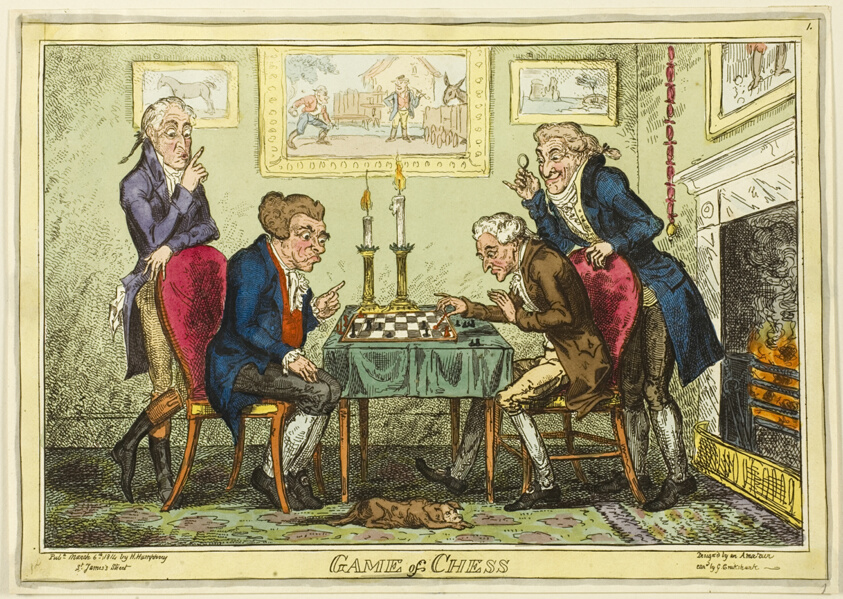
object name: Print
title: Game of Chess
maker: George Cruikshank (English, 1792-1878); after Captain Frederick Marryat (English, 1792-1848); published by Hannah Humphrey (English, c. 1745-1818)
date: published March 6, 1814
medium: Hand-colored etching on paper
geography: England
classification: etching; print; prints and drawing